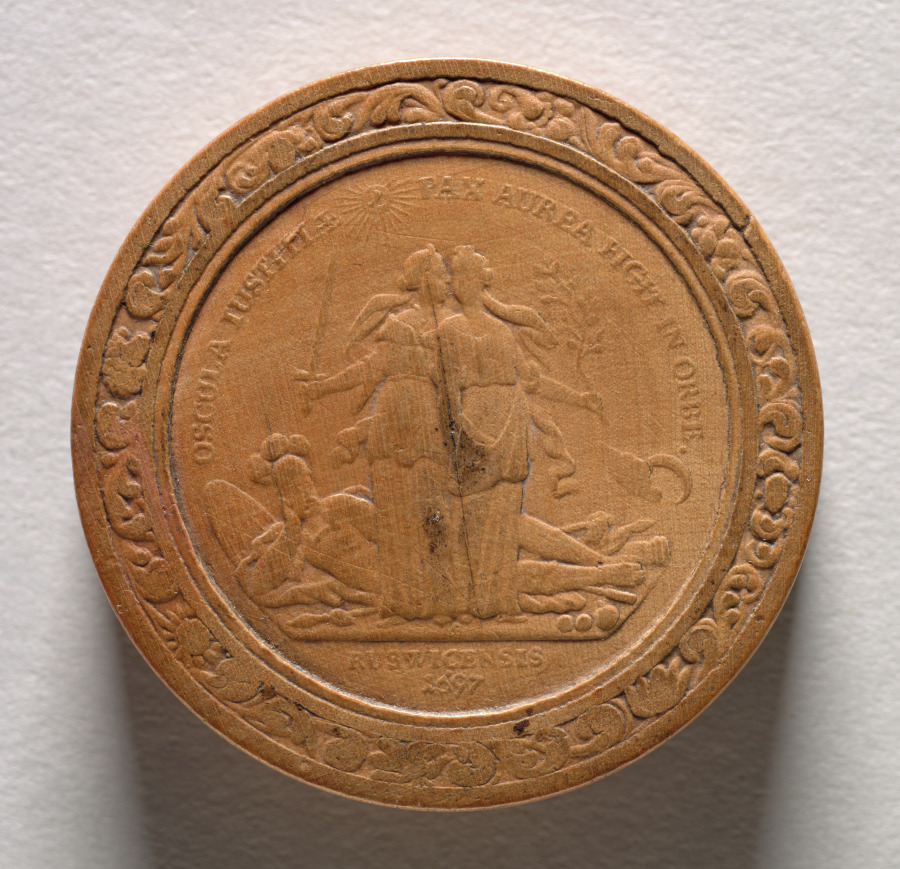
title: Gaming Piece (reverse)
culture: Germany, late 17th-early 18th Century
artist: Martin Brunner (German, 1659–1725)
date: c.1700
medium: wood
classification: Furniture and woodwork